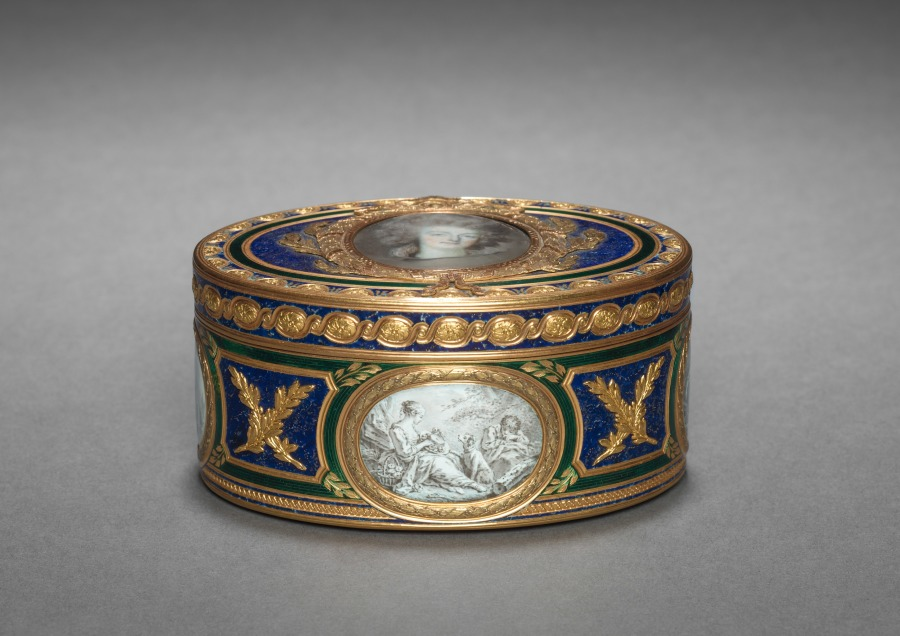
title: Snuff Box (Tabatière) with Portrait of Marie Antoinette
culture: France, 18th century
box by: Pierre-François-Mathis de Beaulieu (French)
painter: François Dumont (French, 1751–1831)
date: 1768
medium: watercolor on ivory in a gold and enamel box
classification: Enamel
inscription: [Maker's mark of Pierre-François-Mathis de Beaulieu, master goldsmith in 1768, inside cover]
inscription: [Charge mark of Jean-Jacques Prévot, 1762-1768, inside cover]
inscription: [Warden's mark of Paris, 1768-1769, inside cover]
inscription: [Discharge mark of Julien Alaterre, Paris, 1768-1774, on neck at right]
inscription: [Inside box, the letter]: "F"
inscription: [On bezel at left, engraved number]: "627"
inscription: [On front of bezel, engraved signature]: "Ve Georges Beaulieu à Paris"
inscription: [On right of miniature portrait, the letter]: "D"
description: This box was created through the collaboration of two skilled and well-known artisans of the period, master goldsmith Pierre-François-Mathis de Beaulieu and celebrated miniature painter François Dumont. The portrait of Marie Antoinette on the box's lid is painted in Dumont’s own style while those on the sides and bottom of the box take inspiration from the work of painter François Boucher, known for his pastoral scenes in the Rococo style.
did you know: Marie Antoinette, queen consort of French King Louis XVI and great patron of the decorative arts, was executed in 1793 at the end of the French Revolution.